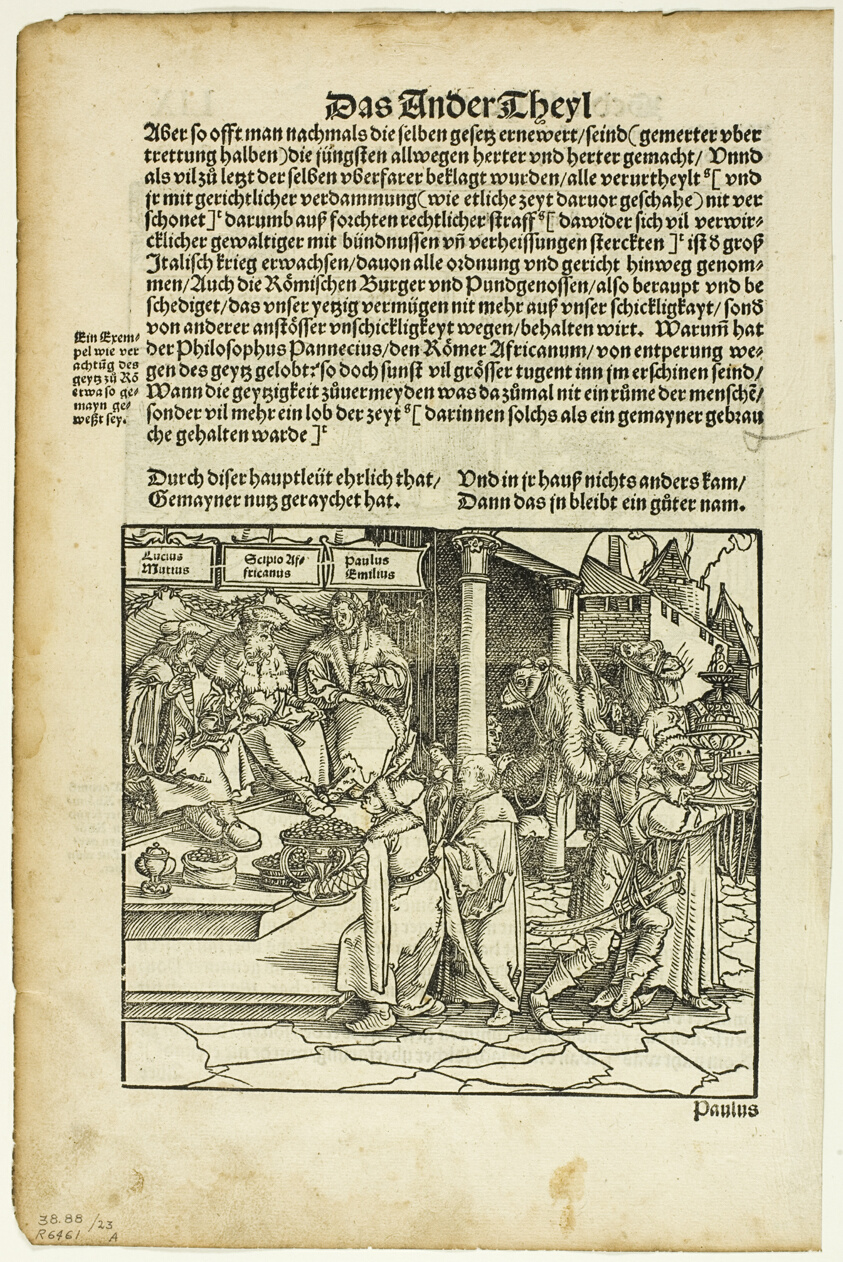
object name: Print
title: Lucius Mutius, Scipio Africanus, and Paulus Aemilius (recto) Battle Scene (verso) from Officia M.T.C., plate 23 from Woodcuts from Books of the XVI Century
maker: Hans Weiditz II (Master of Petrarch) (German, c.1495-1536); assembled by Max Geisberg (Swiss, 1875-1943)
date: 1531, assembled into portfolio 1937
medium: Woodcut on paper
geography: Germany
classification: woodcut; print; prints and drawing